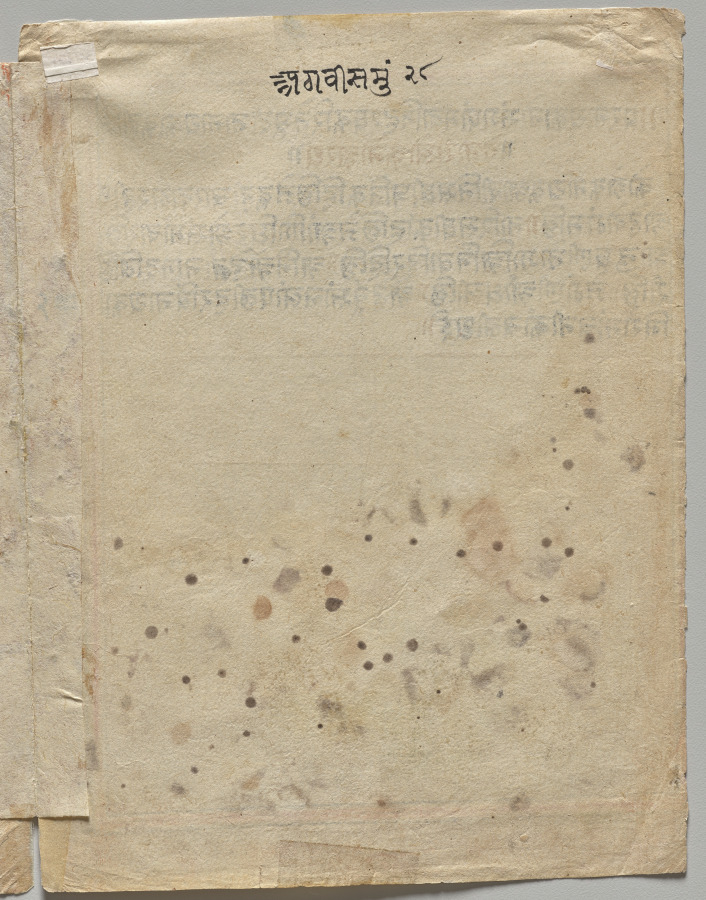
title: A Young, Angry Heroine, Folio 28 from a Rasamanjari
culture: Northwestern India, Rajasthan, Rajput Kingdom of Mewar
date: c. 1615–20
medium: Gum tempera, ink, and gold on paper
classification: Painting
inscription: Recto, upper center: You are expert in flirtation; you are charming; you are my lord and wonderful in your youthful handsomeness.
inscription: Recto, center: Madya Dhira Adhira.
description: The scene of a conversation between two lovers is set within a bedchamber, golden curtains pulled up. The heroine sits on the bed, with three long-necked wine vessels on the wall behind her. A brass ewer for washing with water is on the floor behind the bed.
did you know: Men applied fragrant black pastes to their underarms.